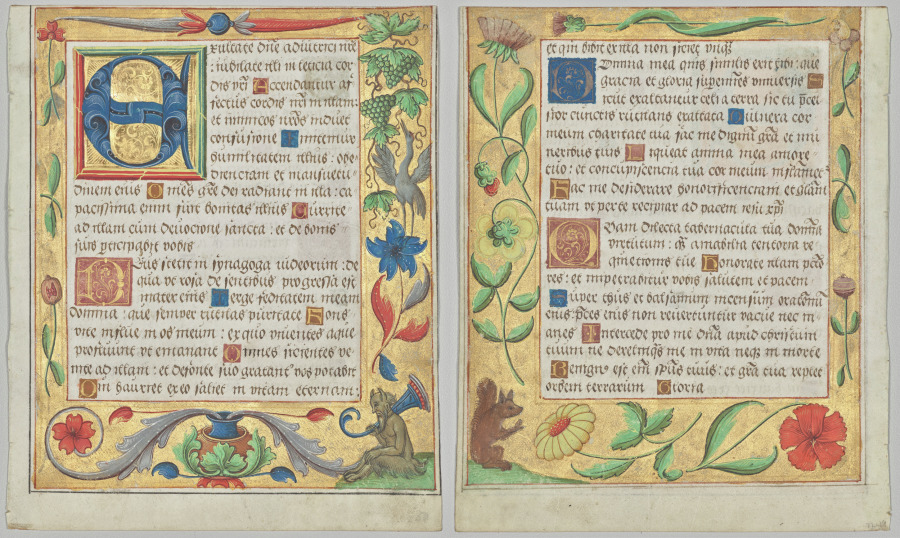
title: Leaf from a Psalter and Prayerbook: Initial E with Ornamental Border Containing a Seated Satyr and a Bird Eating Grapes (recto) and Ornamental Border with Flowers and Squirrel (verso) (2 of 3 Excised Leaves)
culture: North Germany, Hildesheim (?), 16th century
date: c. 1524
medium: ink, tempera and liquid gold on vellum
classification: Manuscript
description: This leaf reveals the charm of secular decoration such as satyrs or domestic activities like cooking. Such details would have been a sumptuous delight to the original owner. The original book was a highly personalized volume apparently written and illuminated in North Germany as suggested by internal textual references. The prominent inclusion of Saint Godehard (died 1038), Bishop of Hildesheim, in the calendar (not visible) would suggest that the manuscript was produced in that city.